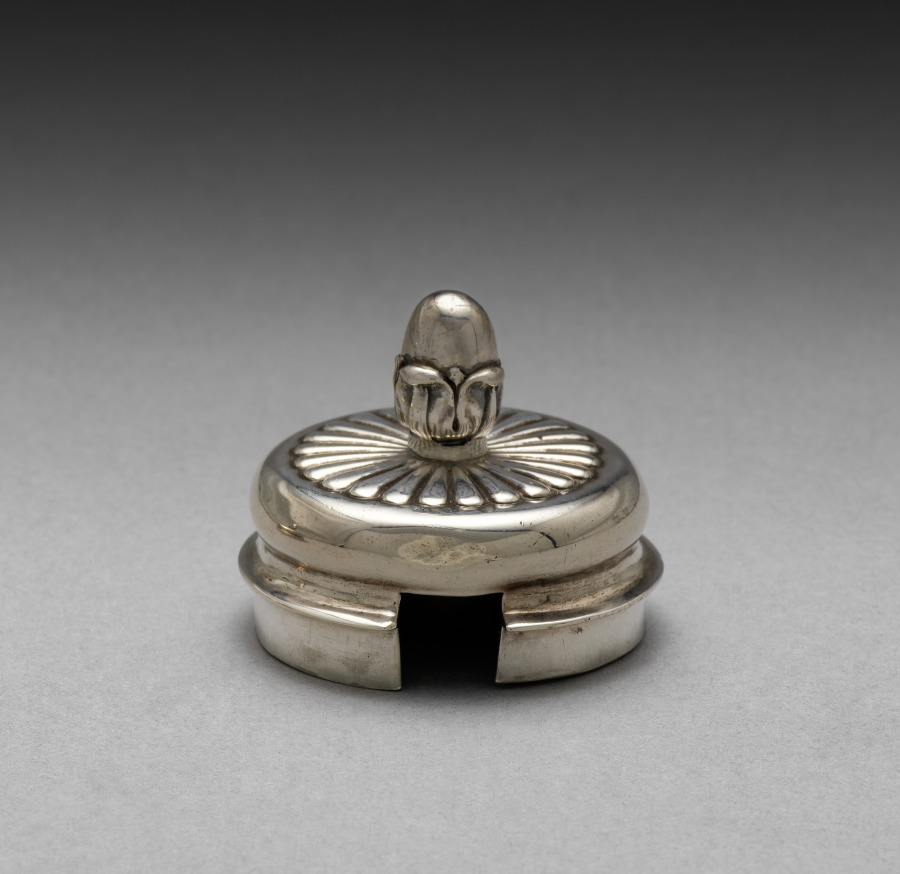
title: Pot (cover)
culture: England, 19th century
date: 1817–18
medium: silver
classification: Silver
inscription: Stamped on lid: "PS", Lion Passant, "b".